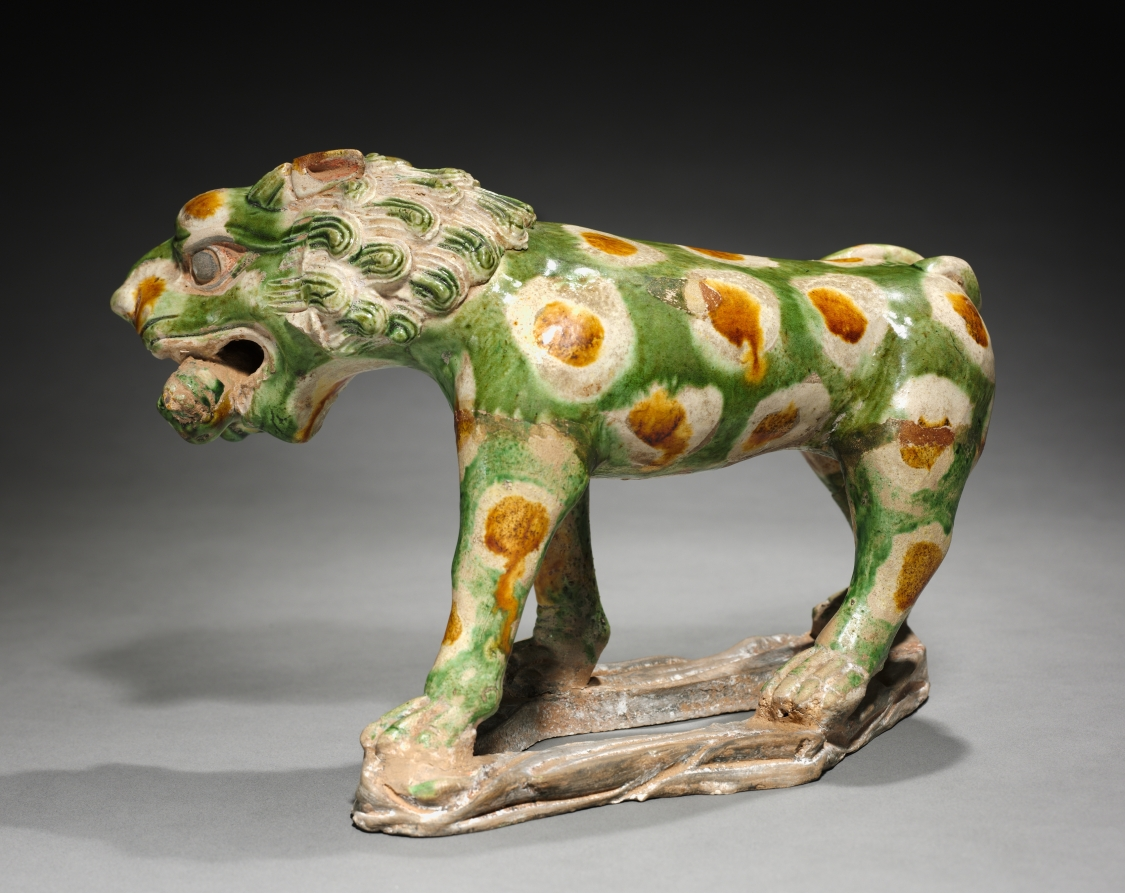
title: Lion with Cub in Mouth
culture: China, Tang dynasty (618-907)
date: 618–907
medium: earthenware with polychrome glaze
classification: Sculpture